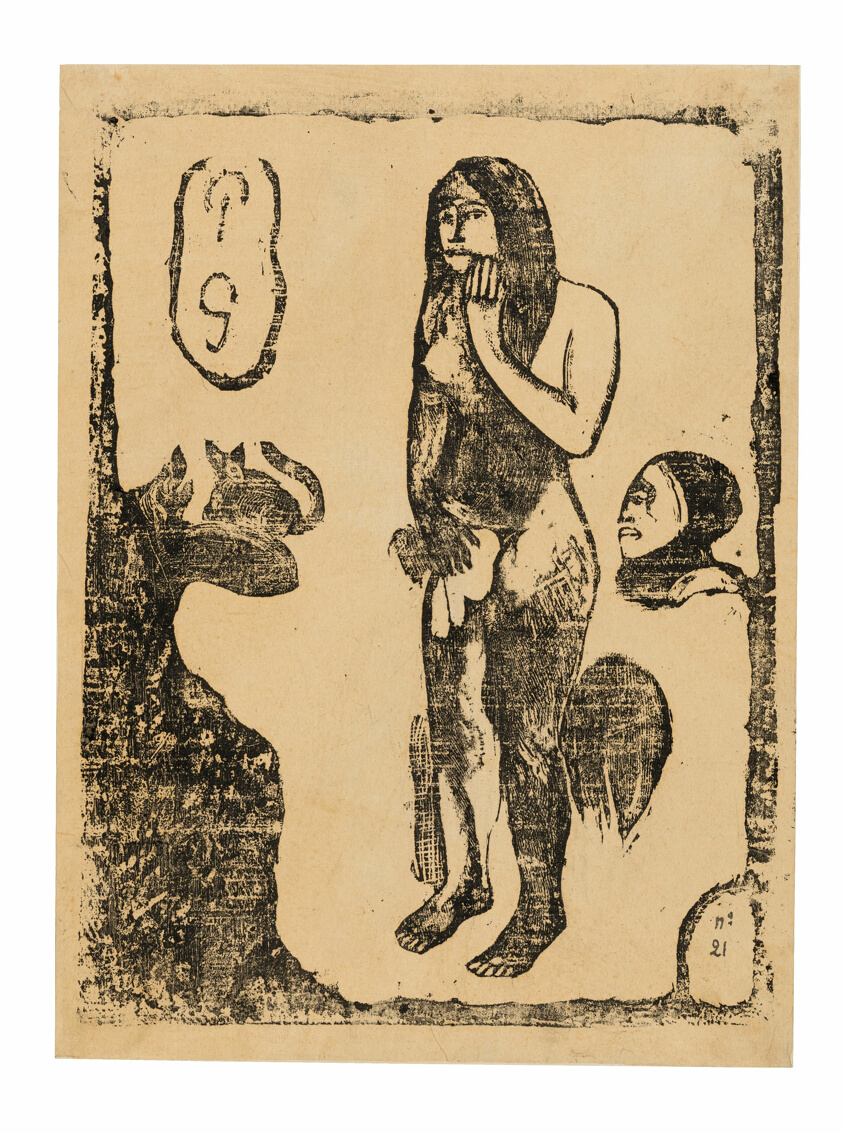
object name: Print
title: Eve, from the Suite of Late Wood-Block Prints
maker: Paul Gauguin (French, 1848-1903)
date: 1898/99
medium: Wood-block print in black ink on thin ivory Japanese paper, laid down on ivory wove paper (discolored to cream)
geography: France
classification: woodcut; print; prints and drawing